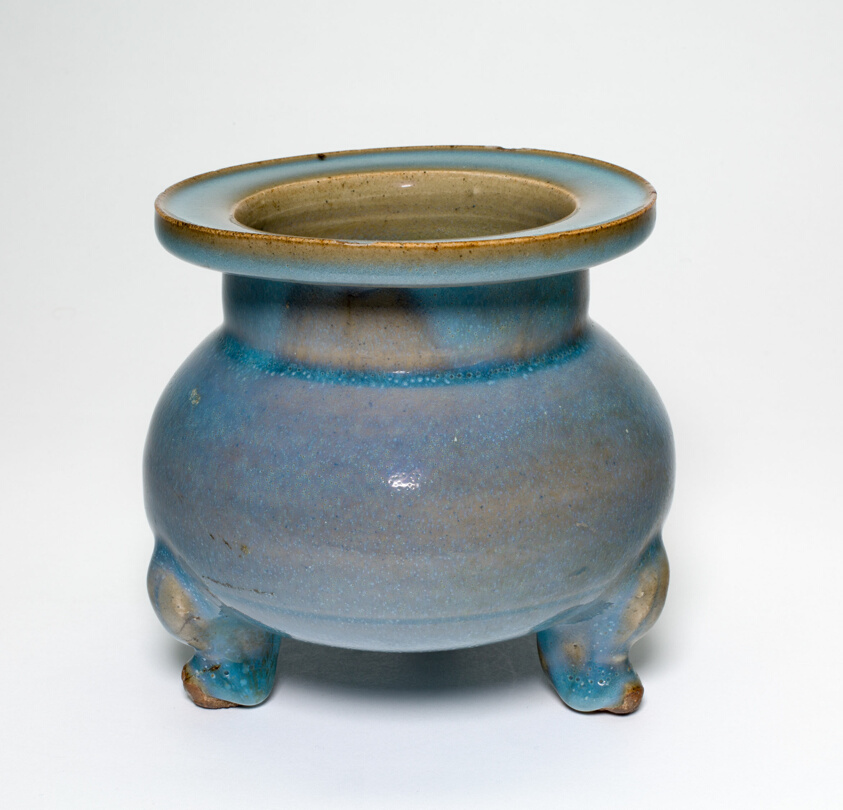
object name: Vessel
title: Tripod Censer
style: Chinese (culture or style)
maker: China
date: Jin dynasty (1115–1234), 13th century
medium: Jun ware; stoneware with opaque blue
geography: China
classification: ceramics; asian art; vessel